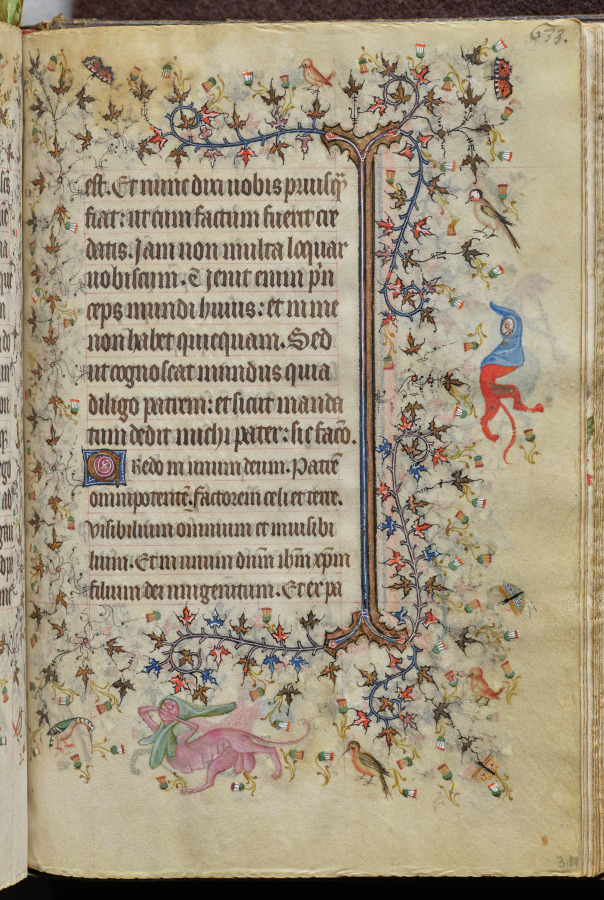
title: Hours of Charles the Noble, King of Navarre (1361-1425), fol. 311r, Text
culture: France, Paris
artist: Master of the Brussels Initials and Associates (French)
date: c. 1405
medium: ink, tempera, and gold on vellum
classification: Bound Volume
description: This precious volume was obviously highly prized by its owner, the French-born King of Navarre, who had his coat of arms painted on no less than twenty folios. Rather than directly commissioning this manuscript from a specific workshop, it seems that Charles the Noble acquired his book of hours -- perhaps ready-made for the luxury market -- while on a trip to Paris in 1404-05. A collaborative effort, six painting styles are evidenced within the pages of this codex, those of two Italians, two Frenchmen, and two Netherlanders. The painter who was responsible for the planning and decoration of the book, and who produced seventeen of the large miniatures, was a Bolognese artist known as the Master of the Brussels Initials. His principal assistant, responsible for most of the borders, was a Florentine who signed his name "Zecho" da Firenze on folio 208 verso.